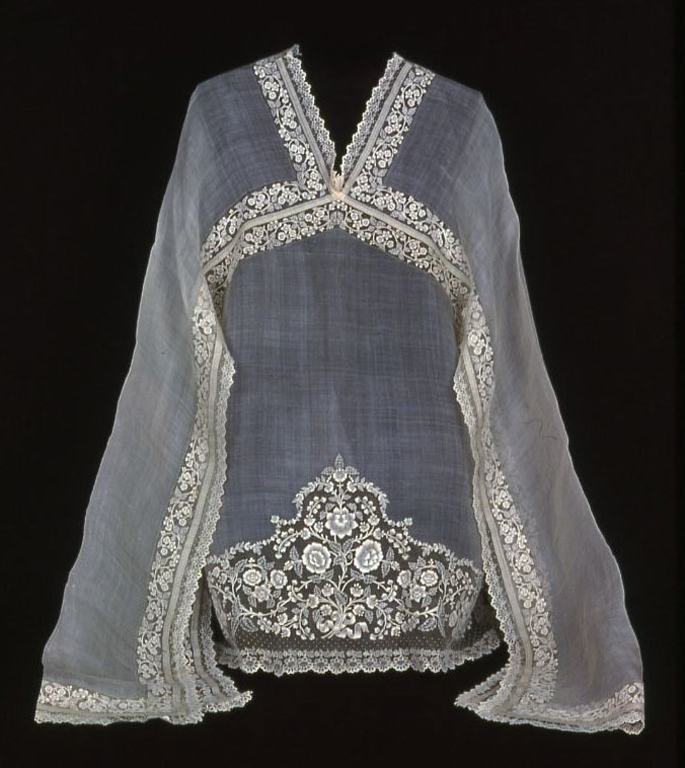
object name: Costume and Accessories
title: Blouse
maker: Philippines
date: 19th century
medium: Pina (pineapple) fiber, plain weave with cotton embroidery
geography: Philippines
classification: textile; weaving; costume - needlework; costume